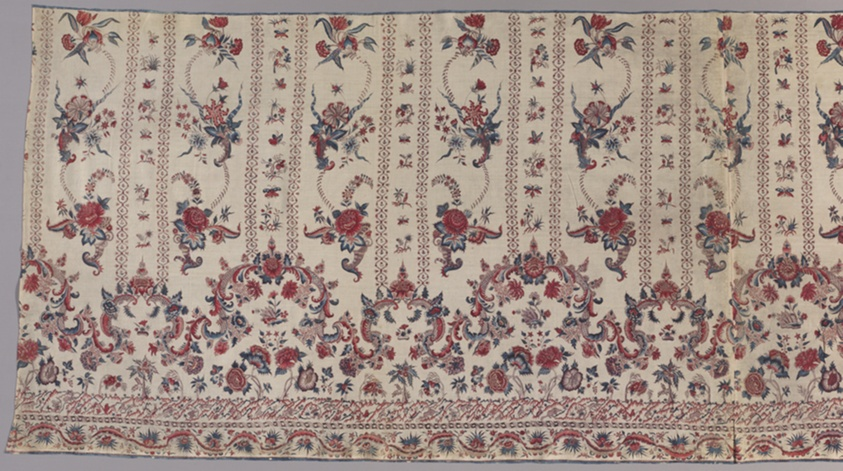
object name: Textile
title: Panel of Chintz for a Woman's Skirt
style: 18th Century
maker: Made in India possibly for the Dutch or Latin American market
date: 1730-50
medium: Cotton, plain weave; hand painted and dyed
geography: India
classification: textile; weaving - printed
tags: paisley, hunter, animals, floral, floral motifs, floral patterns, flowers, scrolls (motifs)